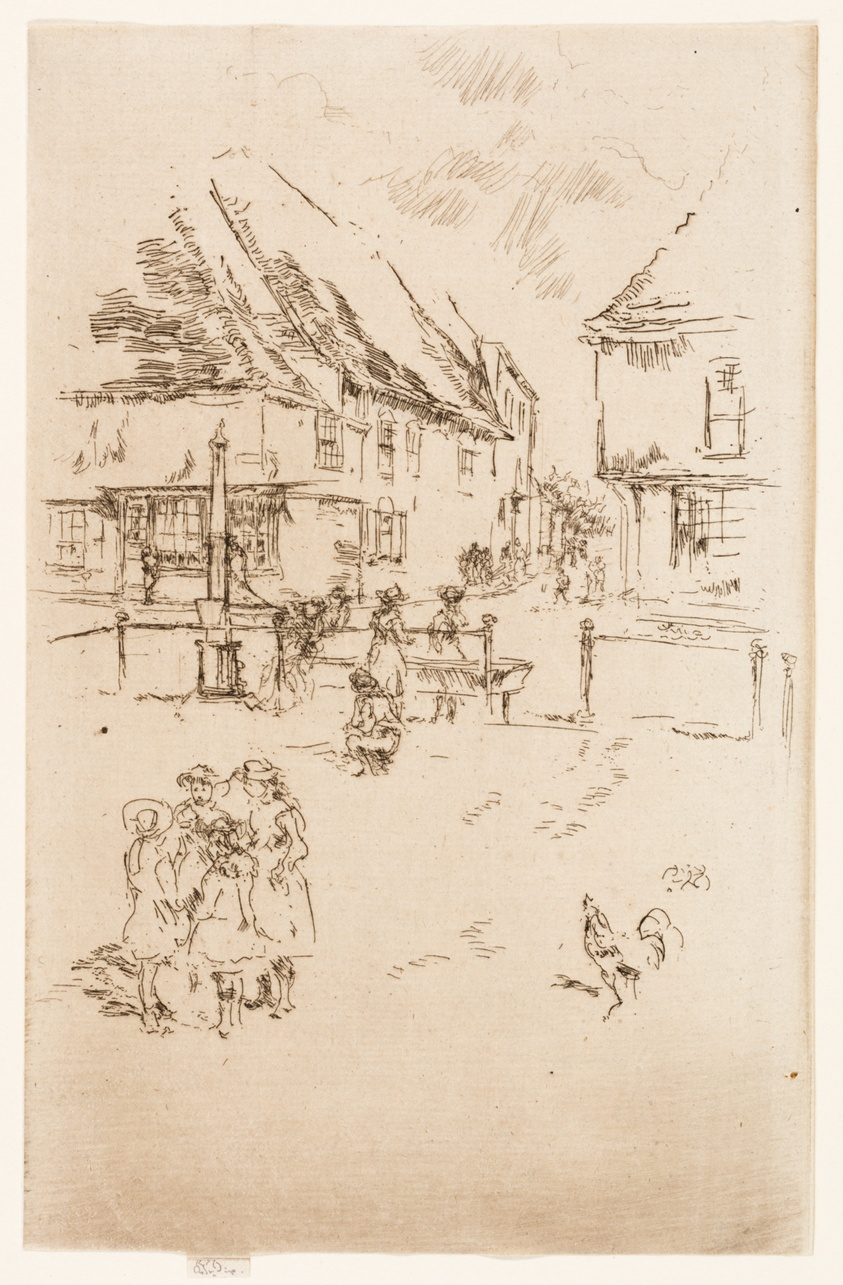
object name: Print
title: The Cock and the Pump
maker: James McNeill Whistler (American, 1834-1903)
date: 1887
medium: Etching with foul biting in black ink on ivory laid paper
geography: United States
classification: etching; foul biting; print; prints and drawing; paper